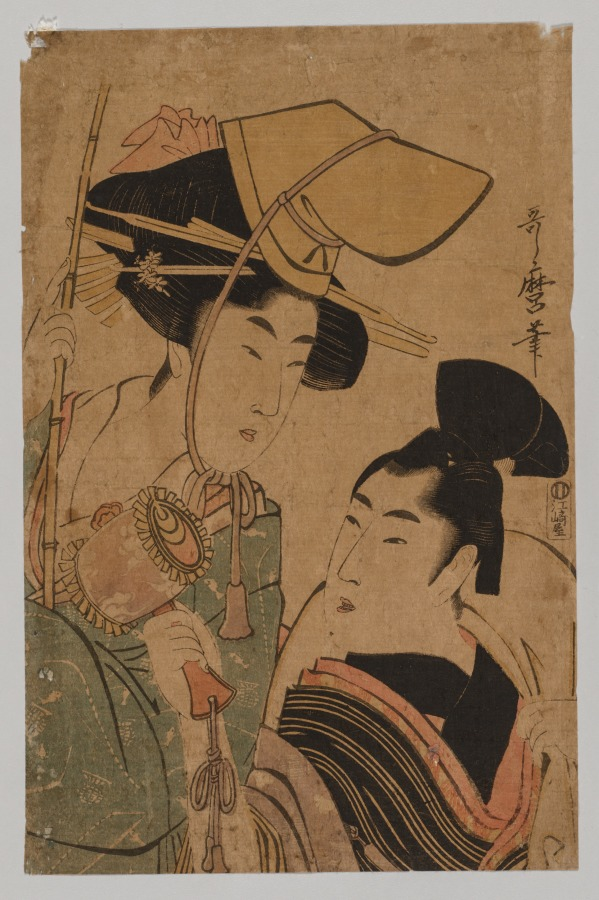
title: Woman Representing Good Fortune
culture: Japan, Edo period (1615–1868)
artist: Kitagawa Utamaro (Japanese, c. 1754–1806)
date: 1753–1806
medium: color woodblock print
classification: Print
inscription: Signature: Utagawa fude Publisher Mark: Yesakiya